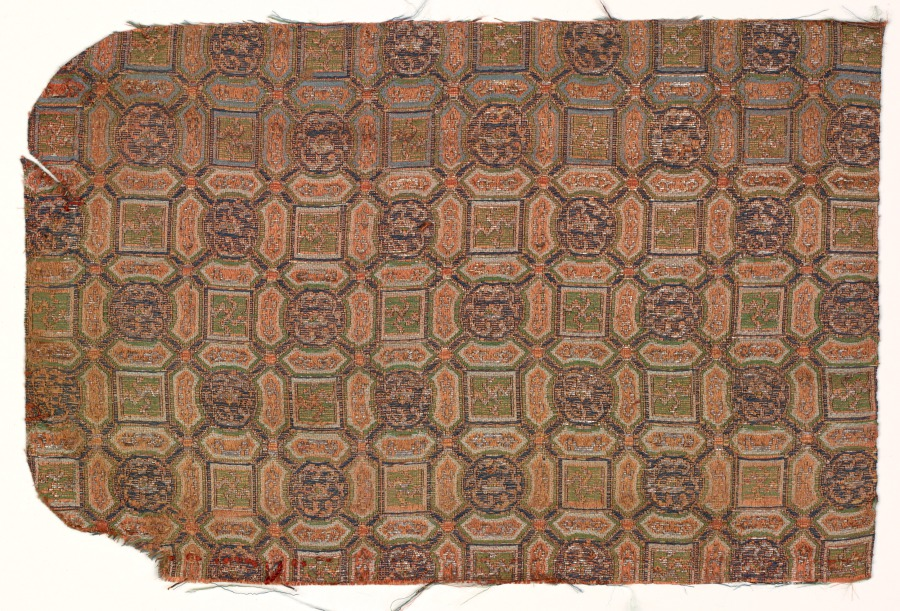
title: Fragment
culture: China, 19th century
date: 1800s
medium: silk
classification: Textile